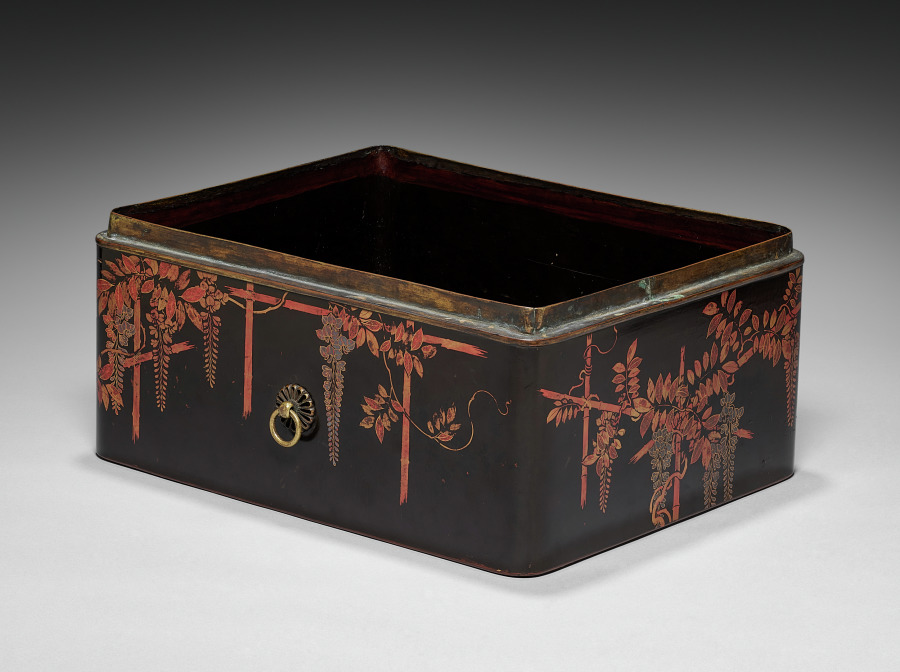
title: Cosmetic Box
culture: Japan, Momoyama period (1573–1615)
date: 1573–1615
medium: wood with lacquer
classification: Lacquer